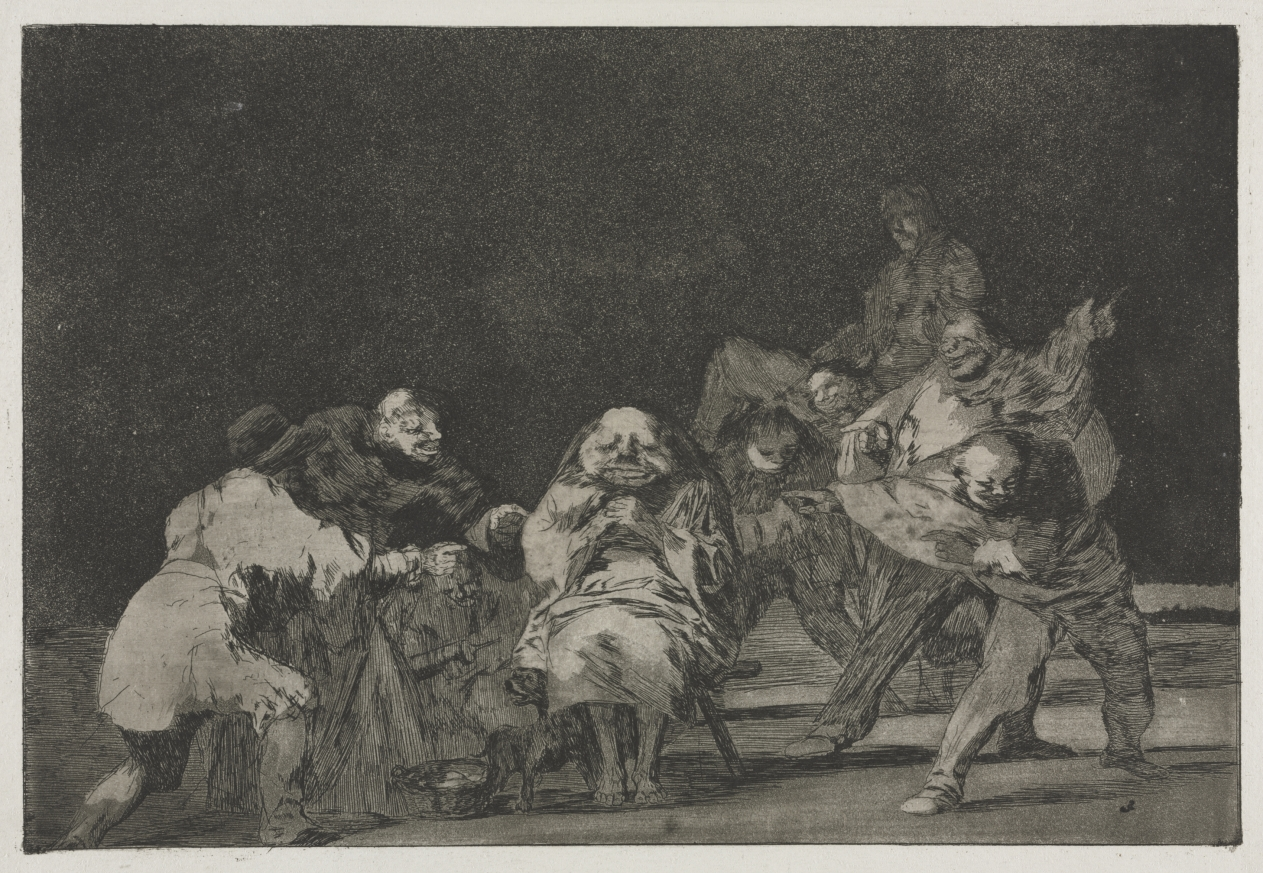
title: The Proverbs: Loyalty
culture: Spain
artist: Francisco de Goya (Spanish, 1746–1828)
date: 1864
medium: etching and aquatint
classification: Print